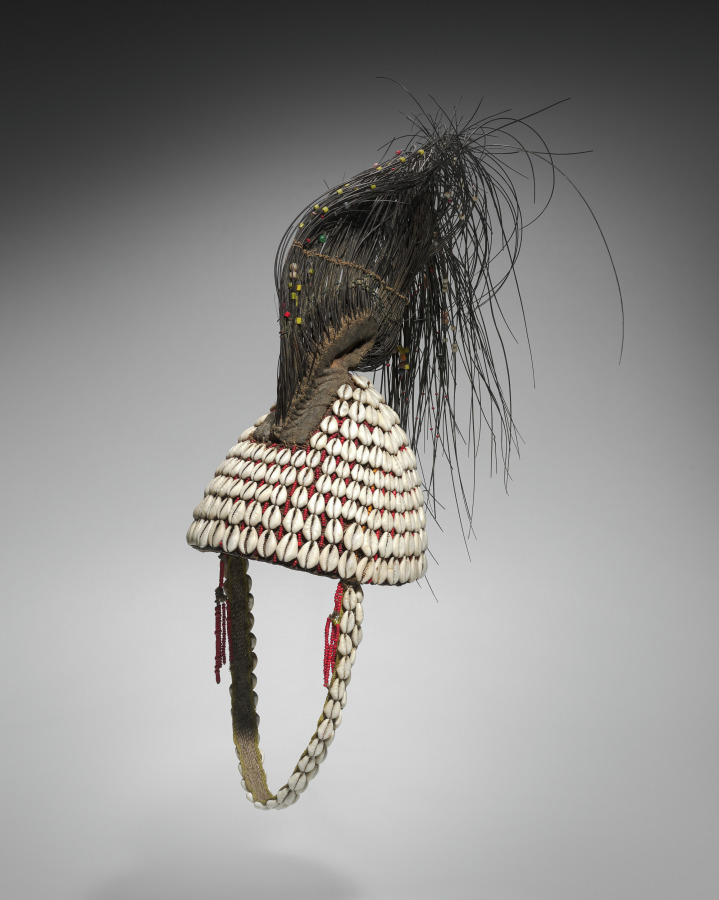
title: Bwami Prestige Cap (Mukuba or Nkumbu)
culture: Africa, Central Africa, Democratic Republic of Congo, Lega-style maker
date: early to mid-1900s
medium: Plant fibers, elephant rawhide and hair, cowrie shells, glass beads, and cord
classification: Garment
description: Hats of different types, sizes, and materials figure prominently in the Lega people’s Bwami association where they indicate status and rank. Cone-shaped hats made of canvas covered with cowrie shells and surmounted by an elephant tail are worn during initiations into kindi, the highest of the five male grades. This prestige cap uses a variety of local and imported materials to show its wearer's importance. The plant fibers that support the hat and the elephant hair were sourced in Central Africa, while the beads and cowrie shells were imported. The beads were made in Europe, while the cowrie shells came from the Indian Ocean region. The might of Bwami members is likened to the elephant’s potentially destructive strength.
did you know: While identified with Africa, cowrie shells were generally imported from the Indian Ocean region. After being collected near the Maldives islands, these Indo-Pacific shells entered parts of Africa via overseas trade routes.